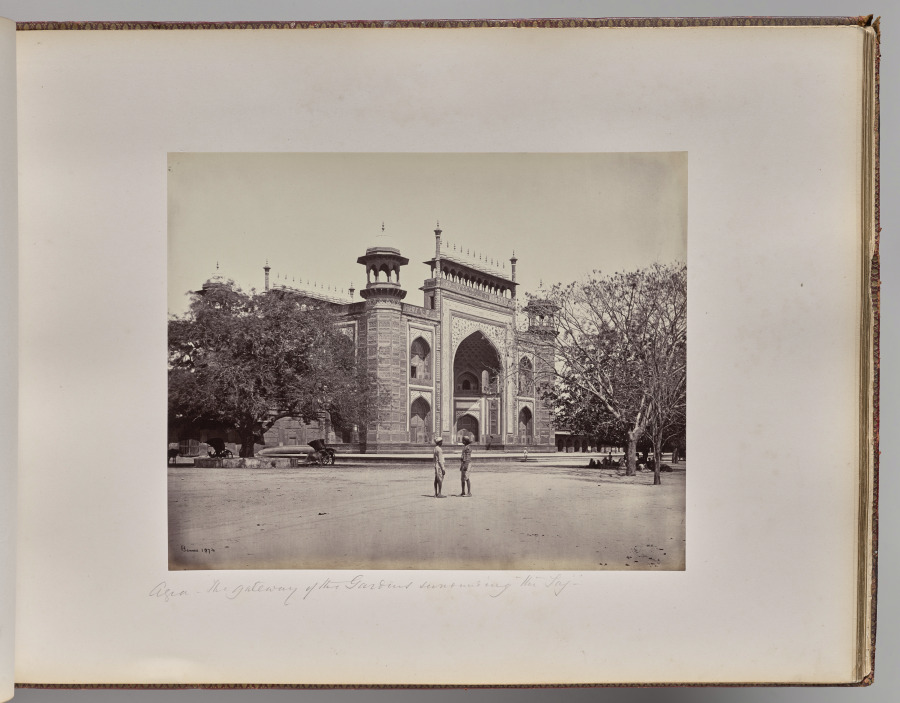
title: Agra. The Gateway of the Gardens Surrounding the Taj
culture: England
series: Photographs of Northern India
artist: Samuel Bourne (British, 1834–1912)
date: 1863–70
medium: albumen print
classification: Photograph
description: The 50 images in this album, all taken in the 1860s, move from the hill towns of the Himalayas down to cities including Lahore (now in Pakistan), Delhi, Lucknow, Agra, Benares (now Varansi), and Calcutta (now Kolkata). Architectural studies of major monuments offer valuable historical records of what sites such as the Taj Mahal and the imperial mosque of the Mughal emperors in Delhi looked like before twentieth-century restorations.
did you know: Samuel Bourne, the author of most the images in this album, was a banker in England before he moved to India to become a professional photographer.